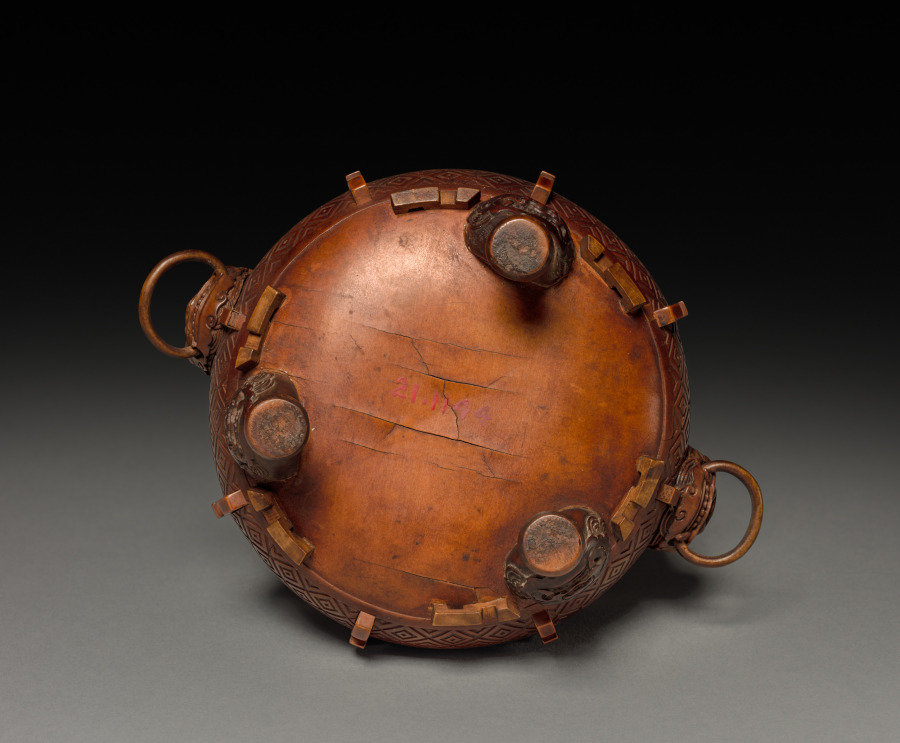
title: Tripod with Cover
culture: China, Qing dynasty (1644-1911)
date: late 1700s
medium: carved wood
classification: Wood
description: In the Qing (1644–1911) dynasty, luxury items became more affordable to larger parts of the society, including women, merchants, and literati in non-official positions. Imperial patronage and a growing urban population encouraged consumption of luxury goods and local craftmanship. This wooden tripod illustrates superb carving skills and the creative mind of the skilled artisan who sought clients on a competitive market.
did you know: Each leg of the tripod is decorated with a lion head.